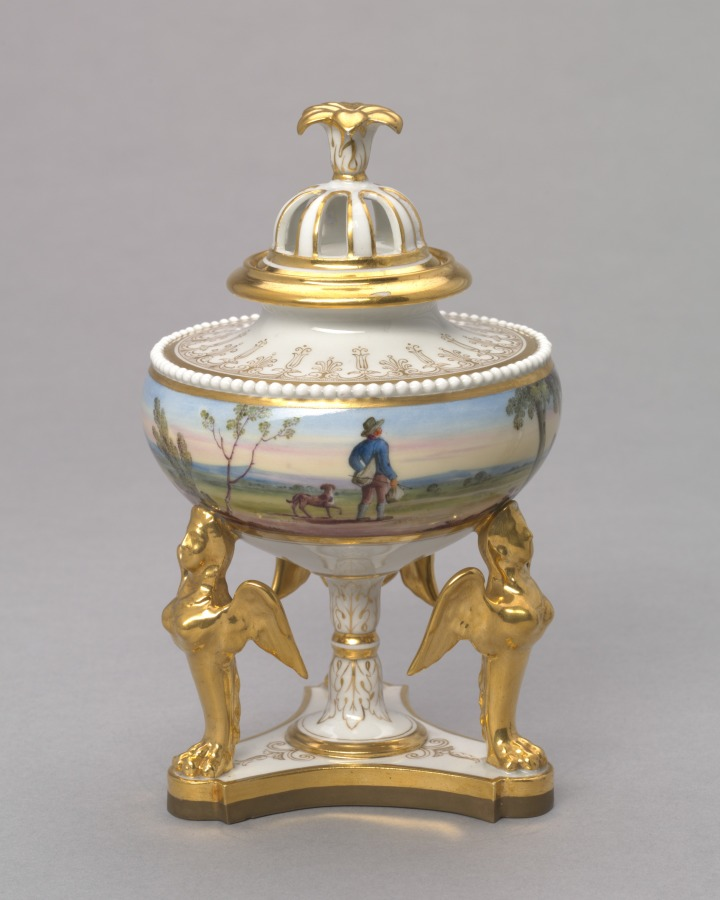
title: Urn and cover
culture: England, Worcester, 19th century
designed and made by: Flight, Barr and Barr (British)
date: c. 1815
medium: artificial porcelain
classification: Ceramic